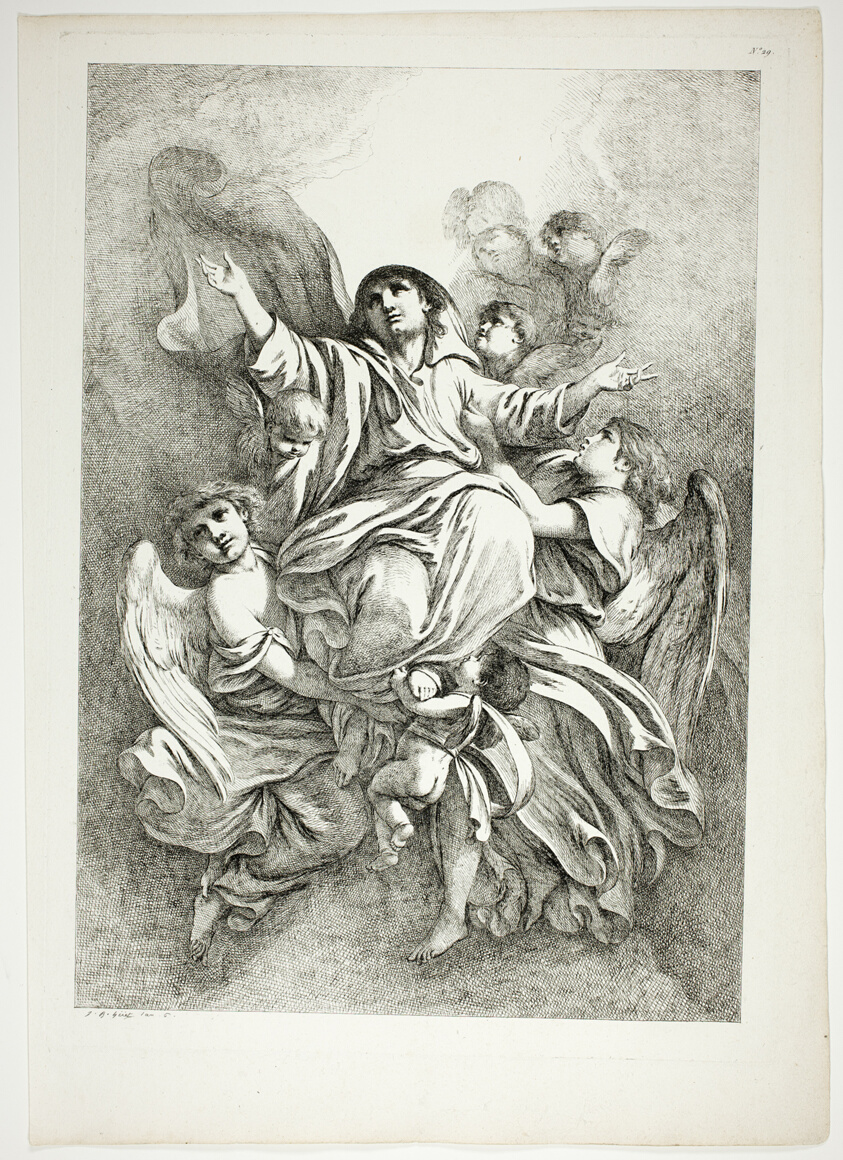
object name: Print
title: Plate 29 of 38 from Oeuvres de J. B. Huet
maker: Jean Baptiste Huet (French, 1745-1811)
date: 1796–99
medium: Etching on paper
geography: France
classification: etching; print; prints and drawing